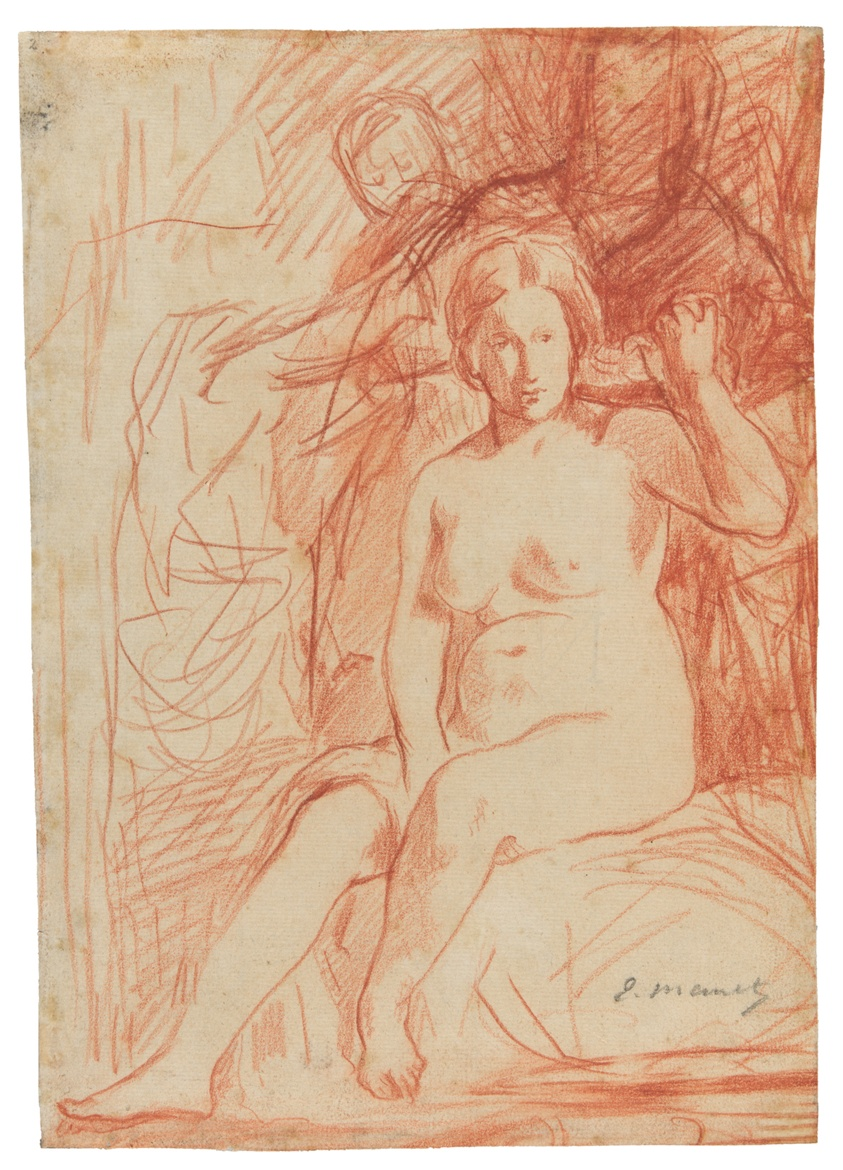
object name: Drawing and Watercolor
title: Seated Nude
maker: Édouard Manet (French, 1832-1883)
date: 1858/60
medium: Red chalk on buff laid paper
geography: France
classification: chalk; drawings (visual works); prints and drawing